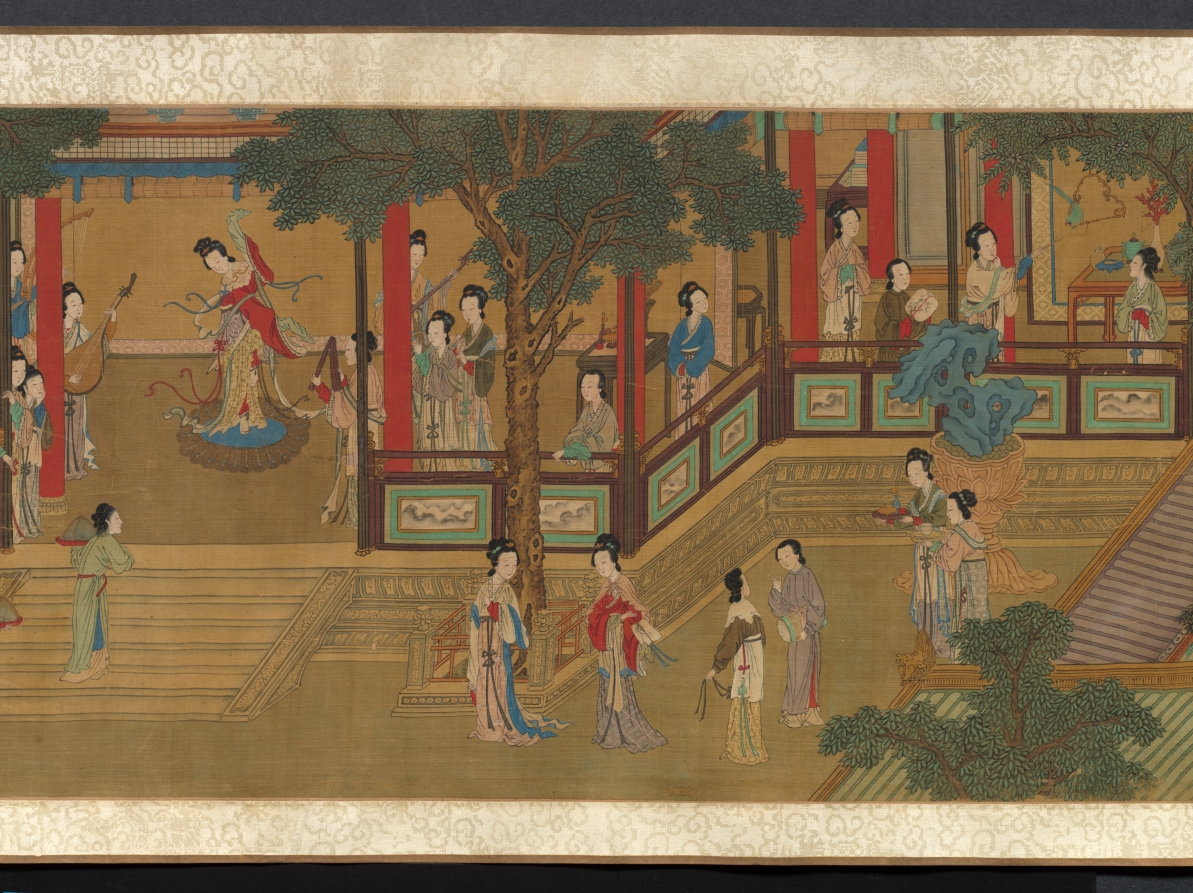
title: Palace Ladies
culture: China, Qing dynasty (1644-1911)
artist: copy after Qiu Ying (Chinese, 1494–1552)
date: 1644–1911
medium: handscroll, ink and color on silk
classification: Painting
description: This handscroll illustrates the pursuits of court ladies in a palace precinct on a spring day. Women, young girls, and their maids amuse themselves by sitting on a swing, playing games, watering and admiring peonies, performing music together, playing the qin (zither), feeding a parrot on the balustrade and fish in the water, or catching butterflies. The life of elite women was mostly restricted to the so-called inner quarters, meaning the garden and inner courts of the house. This painting idealizes the world of young palace girls that in fact was often filled with boredom and waiting for a lover.